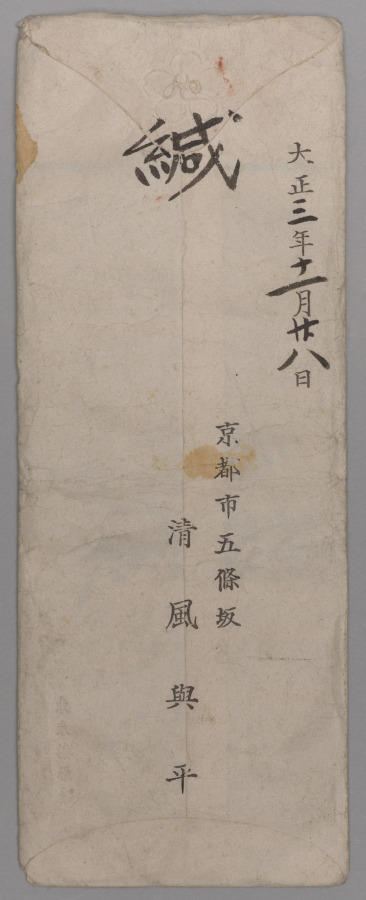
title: Water Container with Peonies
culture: Japan, Meiji period (1868–1912)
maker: Seifū Yohei III (Japanese, 1851–1914)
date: 1900–1914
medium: Porcelain with molded and carved design, green glaze, and black lacquered lid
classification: Ceramic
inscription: 清風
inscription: 帝室技芸員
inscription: 清風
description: This ceramic is an especially accomplished example of Yohei III’s combination of an allover translucent colored glaze with molded and carved designs. It features the peony as its primary motif. The water container, or mizusashi, has a green glaze, and its design takes into consideration the rounded shape and the seated position of the host and guests. It begins low on the body with a flower just beginning to open and continues with another flower a bit higher up, with its petals fully extended and beginning to open outward. It finishes with a flower in full bloom, petals and leaves unfurled and spread outward from the center, now occupying almost the entire surface. The water container once belonged to the Hosokawa family, whose go-between corresponded with Yohei IV about the piece. Yohei IV thanked them for their payment and requested that despite his father’s death in the previous year, they continue to favor the studio with their orders. The letter and its envelope, as well as an auction tag, remain with the object.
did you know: This water container may also serve as a site for cultural reckoning, as when the life cycle of a flower prized in East Asia as a symbol of wealth is displayed across a Japanese chanoyu vessel whose glaze is associated with the seats of power in China and Korea.